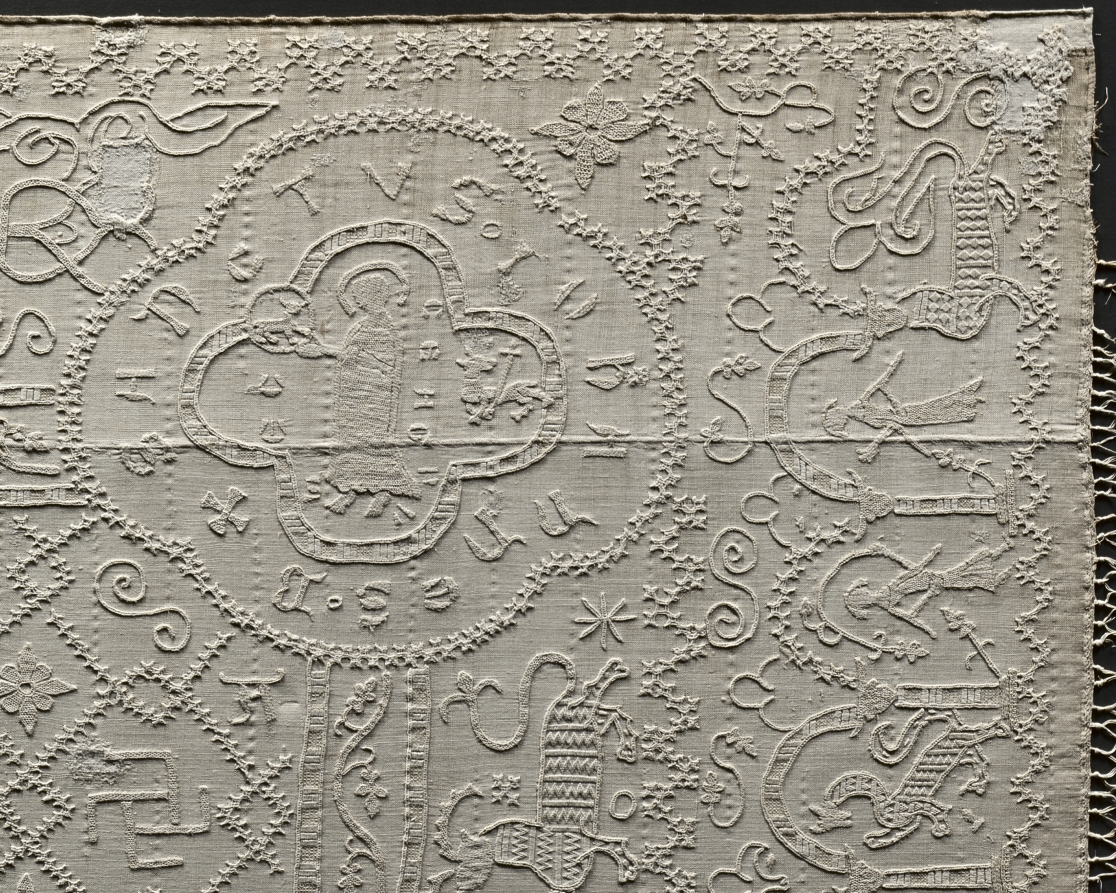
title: Altar Cloth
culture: Germany, Altenberg on the Lahn, Premonstratensian Convent, 14th century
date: c. 1350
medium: embroidery: linen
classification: Embroidery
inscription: various motifs enclosed in quatrefoils with identifying inscriptions in Gothic letters.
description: This large, embroidered altar cloth is one of the rarest, most important medieval church furnishings in existence. It was stitched by nuns in the Premonstratensian Convent in Altenberg on the Lahn River, north of Frankfurt, Germany, and was used to cover the church’s high altar in the weeks leading up to Easter. The cloth is an example of linen embroidery, a specialty of German nuns in the later Middle Ages. The Altenberg monastery church once had valuable furnishings; the high altar retable (a decorated frame with sculptures and paintings on the top of an altar) has survived, the main parts of which are now in the Städel Museum in Frankfurt, Germany.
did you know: When lit from behind, the previously hidden details emerge and the complex design becomes evident.